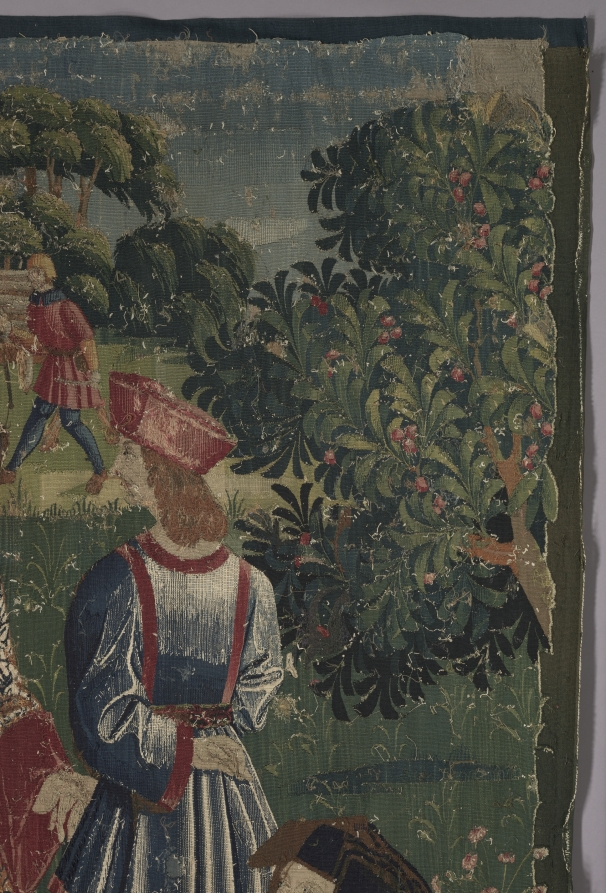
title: Youth (from Chateau de Chaumont set)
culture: France, Lyon(?), early 16th century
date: 1512–15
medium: silk and wool; tapestry weave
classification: Tapestry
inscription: French verse in Gothic letters translates as follows: Youth triumphs while its heart is healthy, And when it seems to hold all in its hand. But this triumph is without eternity. Here one sees the example full well: Those who are happy hide death in thier heart. Let the young heed this warning.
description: Louise of Savoy (1476-1531), queen mother of King Francis I, is depicted here in a sumptuous brocaded velvet in the center. She addresses youthful figures including Éléonore, Pierre Sala’s daughter who is facing her future husband, Hector. On the right, King Louis XII (died 1514) stands in front of the Chateau Langais where he had married Anne of Brittany. Above is Hector’s deceased father with a partially concealed skull under his robe, while a woman expresses surprise at the sight. The verse in Old French at the top states that youthful happiness is not eternal: Youth makes sounds as long as its heart is healthy, And thinks that it holds all in its hand. But this triumph is not eternal. Here you see clearly an example: He that is happy has death in his breast. Of this you people should take note.